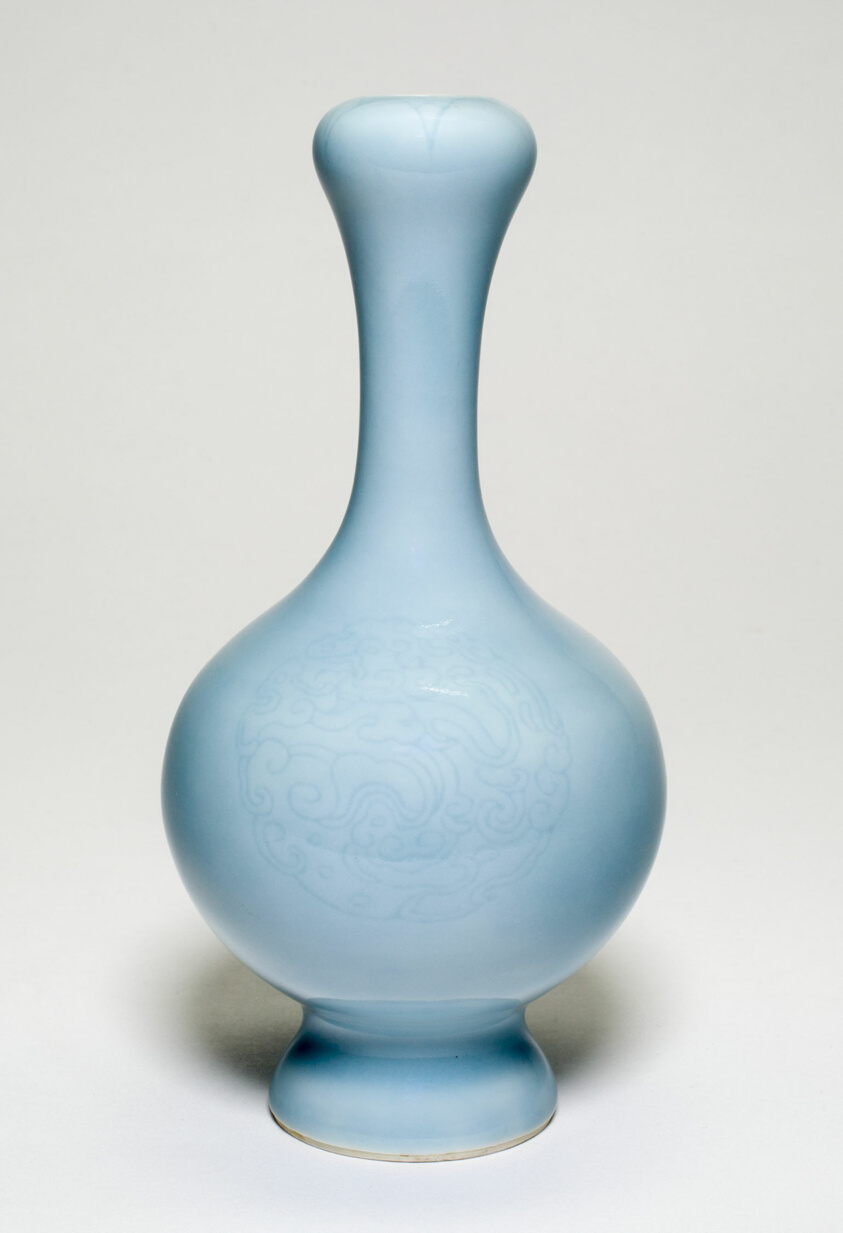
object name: Decorative Arts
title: Bulbous-Shaped Vase and Dragon Design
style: Chinese (culture or style)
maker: China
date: Qing dynasty (1644–1911), Qianlong reign mark and period (1736–1795)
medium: Porcelain with clair de lune glaze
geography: China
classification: vase; porcelain; vessel; asian art; ceramics; decorative arts